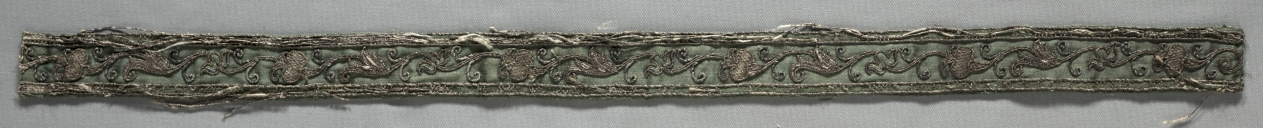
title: Apparel from a Dalmatic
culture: Italy, early 16th century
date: early 1500s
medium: embroidery; silk and metallic threads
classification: Embroidery